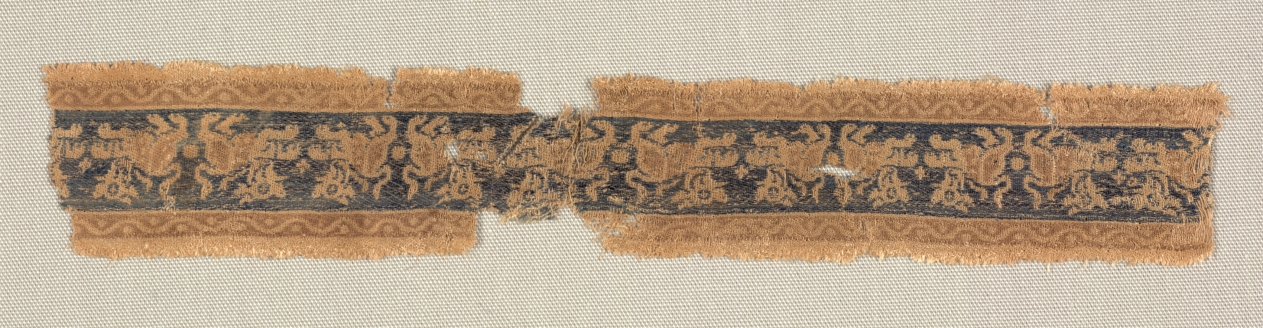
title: Fragment of Band or Border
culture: Syria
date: 500s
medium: silk: compound twill weave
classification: Textile